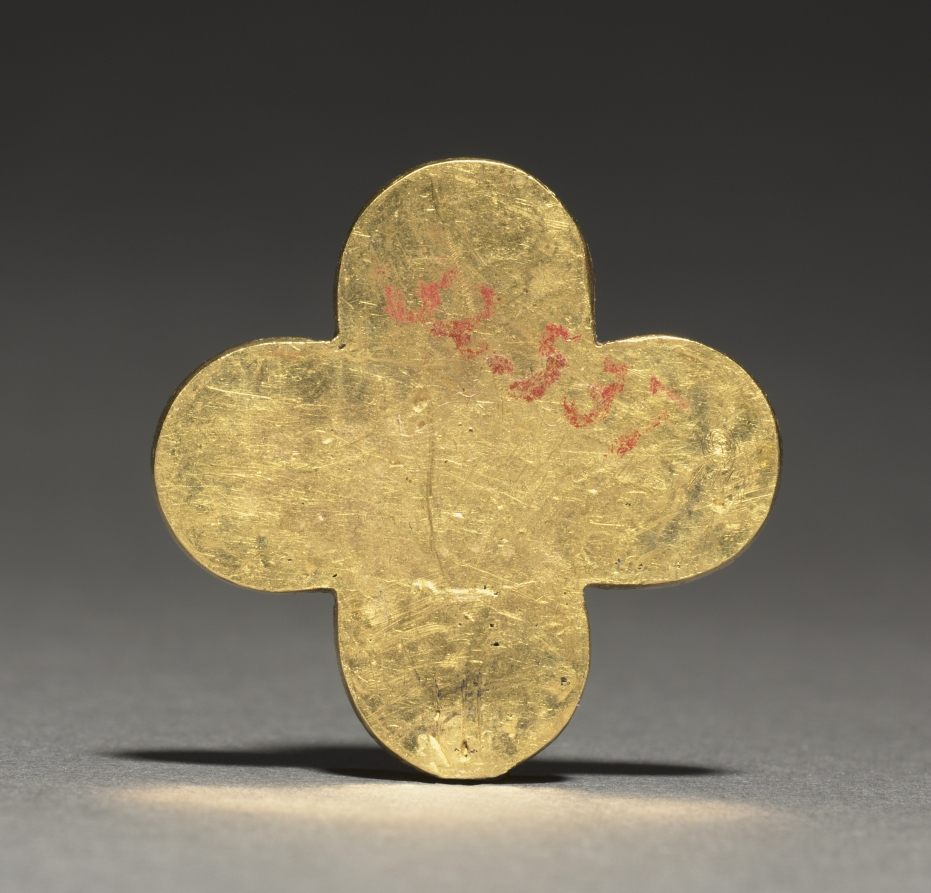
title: Quatrilobed Plaque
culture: France, Paris, Ile-de-France, Gothic period, early 14th century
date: c. 1280–1300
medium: Gold, translucent enamel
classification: Metalwork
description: This rare four-lobed plaque is a superb example of émail de plique, a virtuoso enameling method popular in Paris during the late 1200s with the court of Philip the Fair (reigned 1285–1314). Plaques like this were prepared in advance to be attached to larger works including crosses, chalices, reliquaries, or even sewn into precious fabrics for decoration. Given the very distinctive shape of this plaque it is certain to have been created for a specific commission.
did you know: Julien was not the only artisan to produce émaux de plique; therefore, an exact attribution to an artist is problematic.